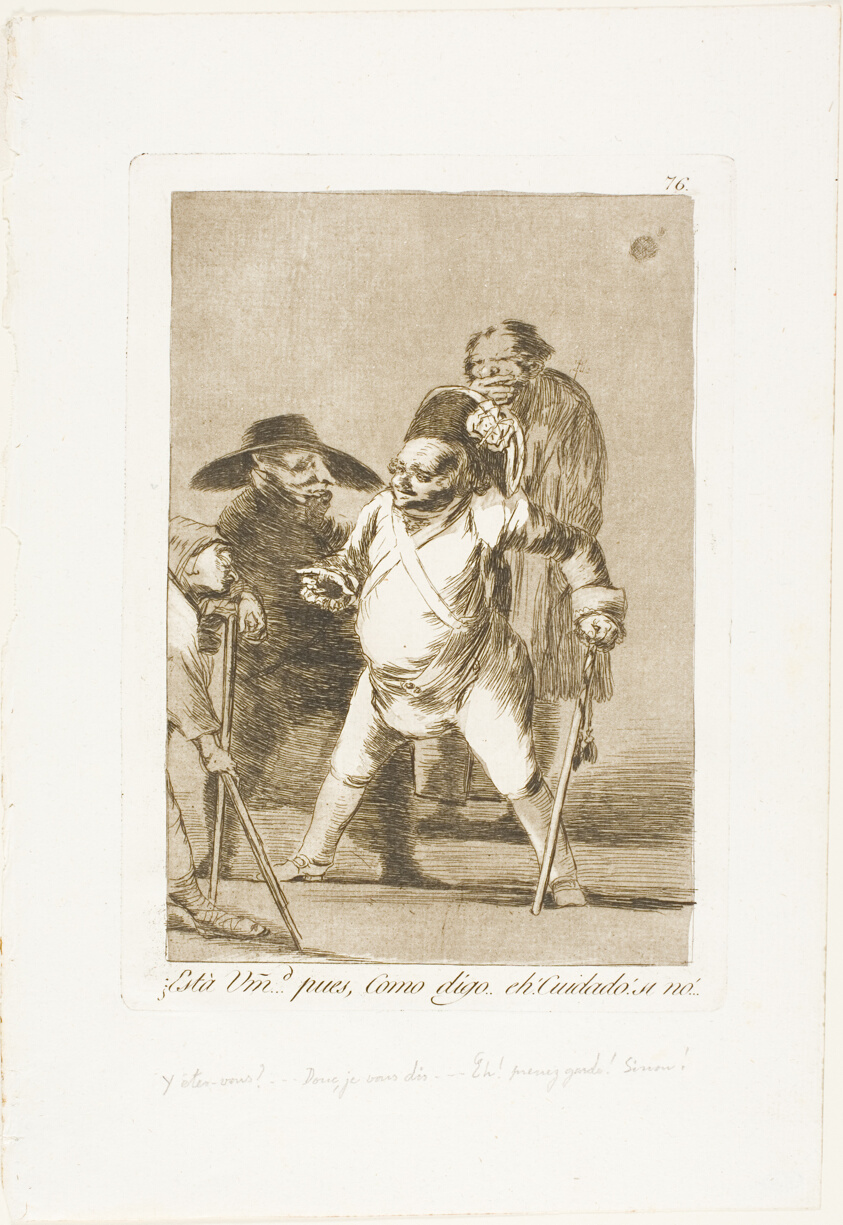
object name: Print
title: You understand? ... well, as I say... eh! Look out! otherwise..., plate 76 from Los Caprichos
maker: Francisco José de Goya y Lucientes (Spanish, 1746-1828)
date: 1797/99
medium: Etching and aquatint on ivory laid paper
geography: Spain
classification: etching; print; prints and drawing